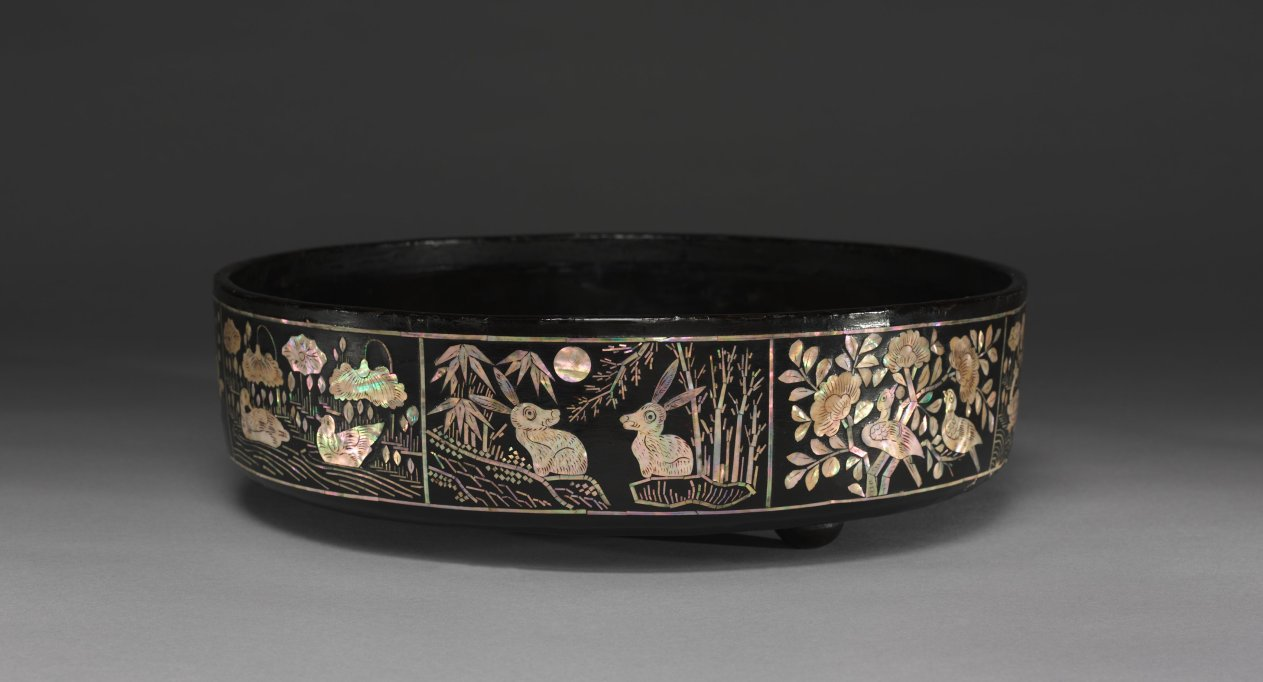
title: Tray for Sewing Tools with Mother-of-Pearl Inlay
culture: Korea, Joseon dynasty (1392–1910)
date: 1800s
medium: lacquer with mother-of-pearl inlay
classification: Lacquer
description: This mother-of-pearl lacquer tray is decorated with various scenes of animals interacting with their natural surroundings. Its flat circular base depicts a pond where a leaping carp and a small school of fish swim below the boughs of a cherry tree. The tray’s exterior wall is densely decorated with various animals paired with plants symbolizing wishful thoughts of longevity, marital happiness, and prosperity.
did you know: Many thin layers of lacquer were applied to the tray's leather core. The design was cut into the dry lacquer and then the mother-of-pearl was inserted.